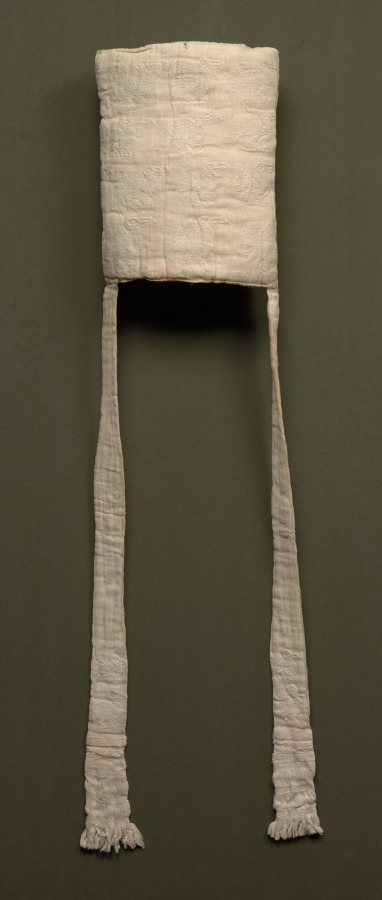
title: Padded Hat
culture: Peru, North Coast, Chimú style, 1200-1460s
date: 1460–1625 (radiocarbon date, 95.4% probability)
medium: cotton; plain weave, brocaded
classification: Garment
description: This garment may have been found with others in the collection that formed a matched set worn by a noble of the Chimú, who rose to power on Peru’s north coast after 1000 AD.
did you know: The Chimú forged an empire that thrived until the 1460s, when the Inka incorporated it into their own imperial domain.